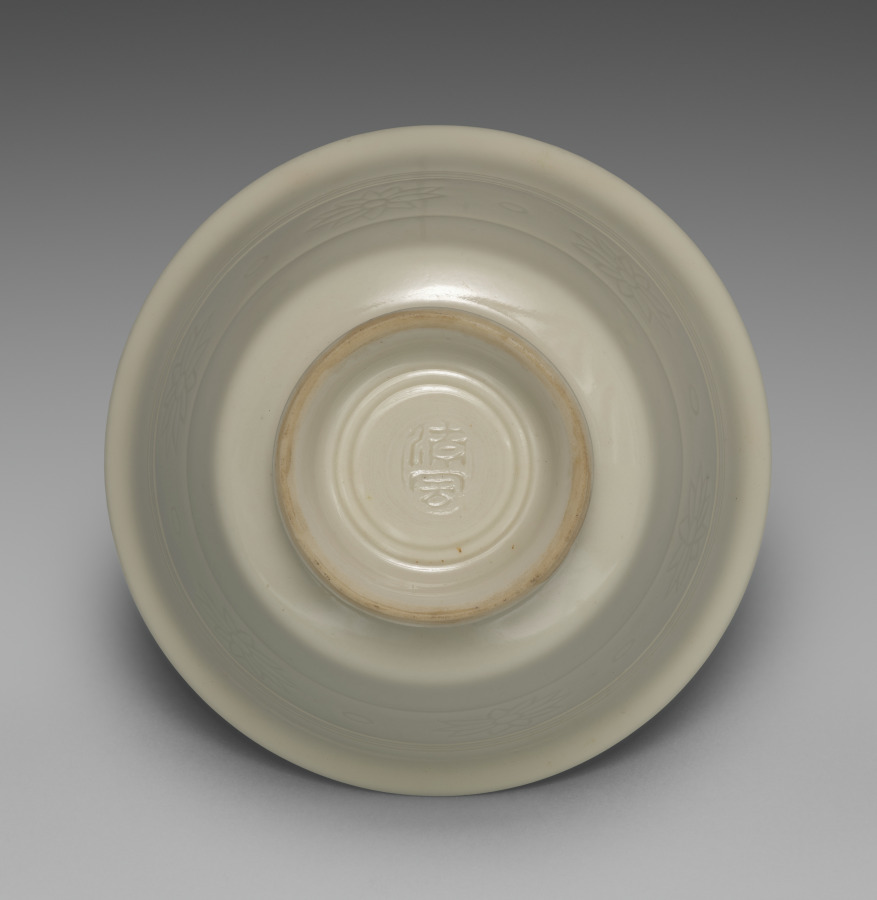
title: Teacup from Teacups with Floral Band Motif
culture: Japan, Meiji period (1868–1912)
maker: Seifū Yohei III (Japanese, 1851–1914)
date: 1893–1914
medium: One from a set of five cups; porcelain with incised decoration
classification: Ceramic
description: The five sencha teacups in this set are decorated with incised flowers and dots between a double band at the top and a single band at the bottom. They are in Yohei III’s creamy taihakuji body and glaze. In their motifs, they are quite similar to an incense burner by Yohei III (see CMA 2022.180), but the flowers are even more simple in design, with no open circle at the center. A label affixed to the side of the box refers to them as “sencha cups in emulation of Korean white [ware].” The reference to Korean ware indicates that even though Yohei was more directly inspired by Qing-dynasty wares from the Dehua kilns in Fujian Province in developing his porcelain clay and glaze for works such as these, the general understanding of the continental models still placed them, at least in terms of color, among pieces broadly associated in Japan with Korean white wares. The delicate cups are thinly potted, so they have a highly desirable translucency.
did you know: The delicate cups in this set are thinly potted, so they have a highly desirable translucency.